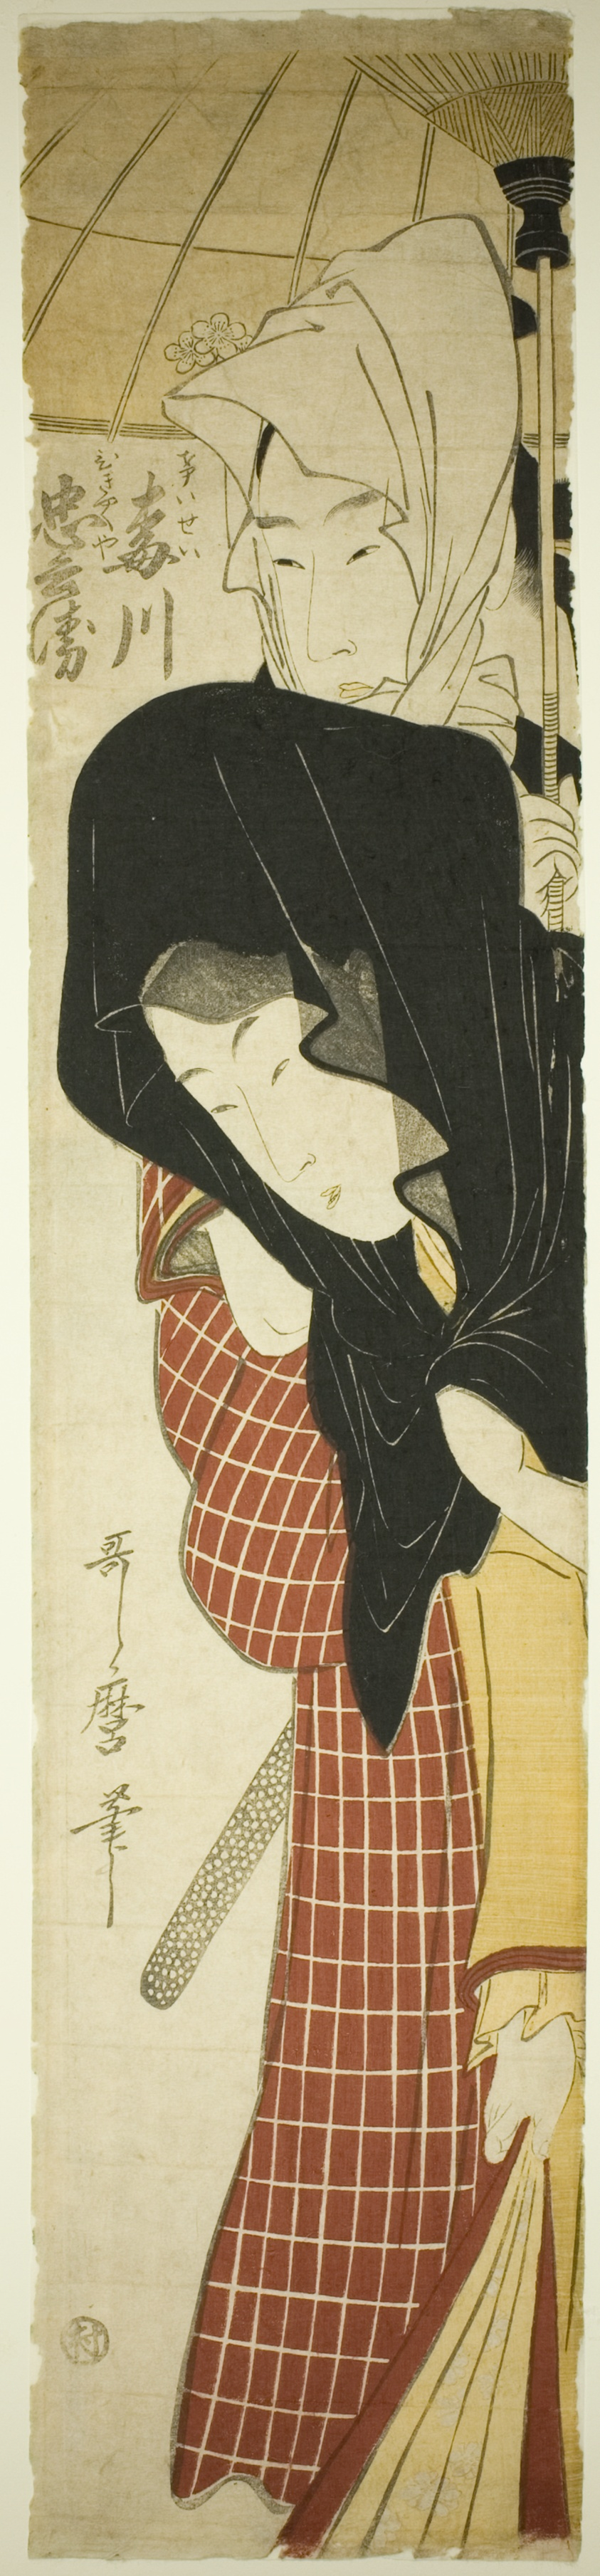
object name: Print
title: The Courtesan Umegawa and Chubei from the Courier Service (Umegawa, Chubei)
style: Japanese (culture or style)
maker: Kitagawa Utamaro 喜多川 歌麿; Japanese, 1753 (?)-1806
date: c. 1797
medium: Color woodblock print, hashira-e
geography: Japan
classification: woodblock print; print; asian art